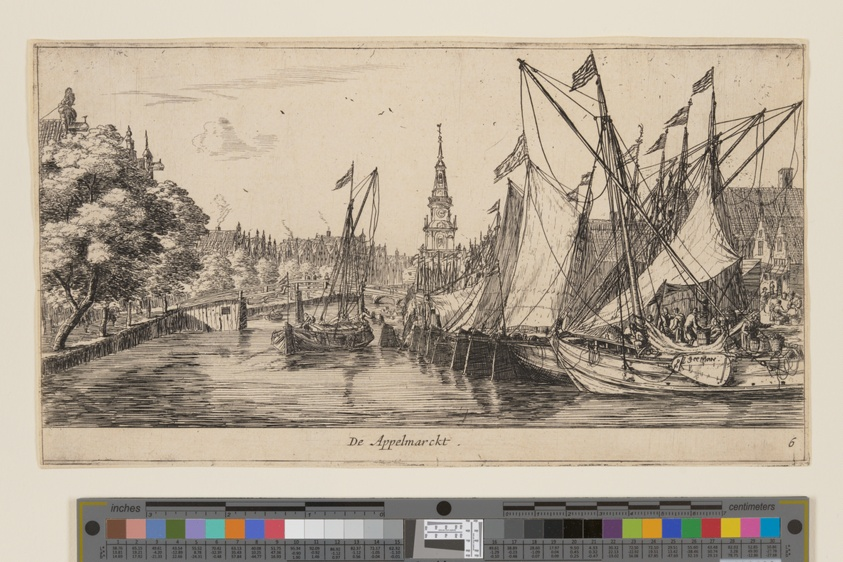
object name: Print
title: De Appelmarckt, from Views of Amsterdam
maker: Reinier Nooms, called Zeeman (Dutch, c. 1623–1664)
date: c. 1660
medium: Etching on ivory laid paper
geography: Netherlands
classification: etching; paper; print; prints and drawing